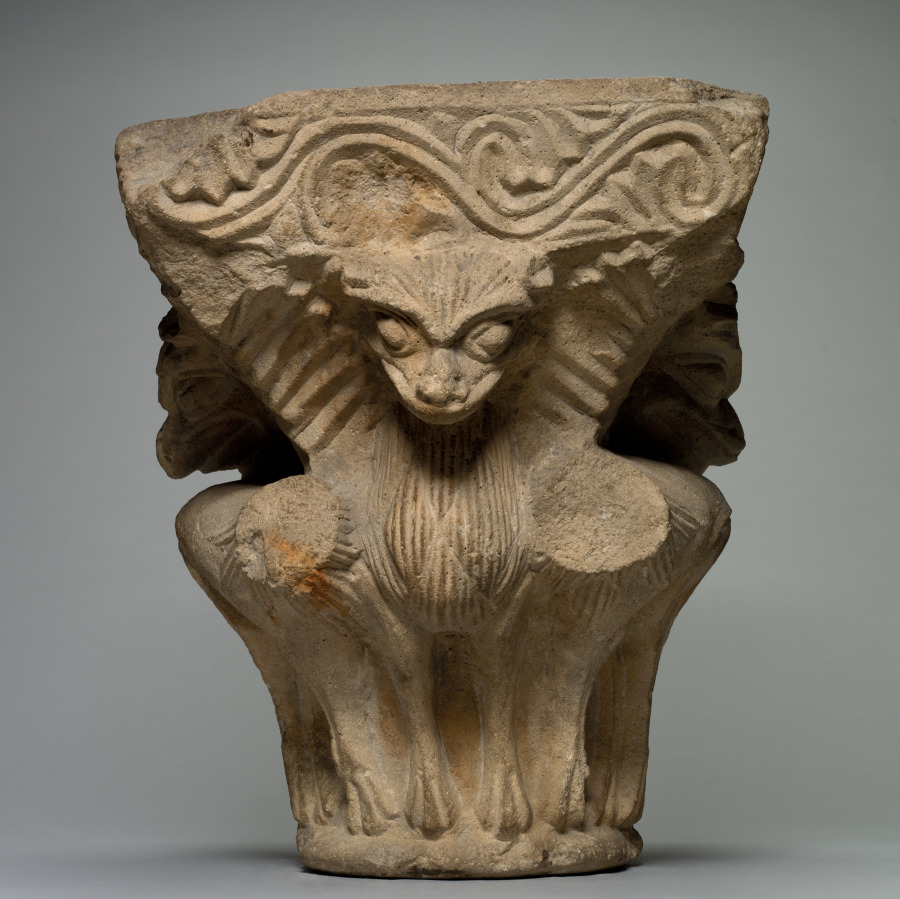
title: Capital with Addorsed Quadrupeds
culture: Southwest France, Languedoc, Toulouse (?), late 12th to early13th Centuries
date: late 1100s-early 1200s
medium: limestone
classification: Sculpture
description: Monstrous images were prevalent in the decoration of religious buildings during the Middle Ages. Such images must have impressed, perhaps even terrified, the monks and visitors who spent much of their time within the cloister or church, a place of prayer, contemplation, and reflection. Scholars have speculated how such images would have been received by the people given the ubiquity of monsters in medieval society. The carved monsters, often symbolizing vice and retribution for sin, were possibly designed to provoke a range of emotional responses including laughter, wonder, surprise, fear, and shock. This striking imagery must have had a strong impact, which in turn led Saint Bernard of Clairvaux (1090–1153), the spiritual head of the Cistercian order, to admonish their use as distracting from prayer.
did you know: A quadruped is an animal with four feet; the specific animal shown here is unidentified.